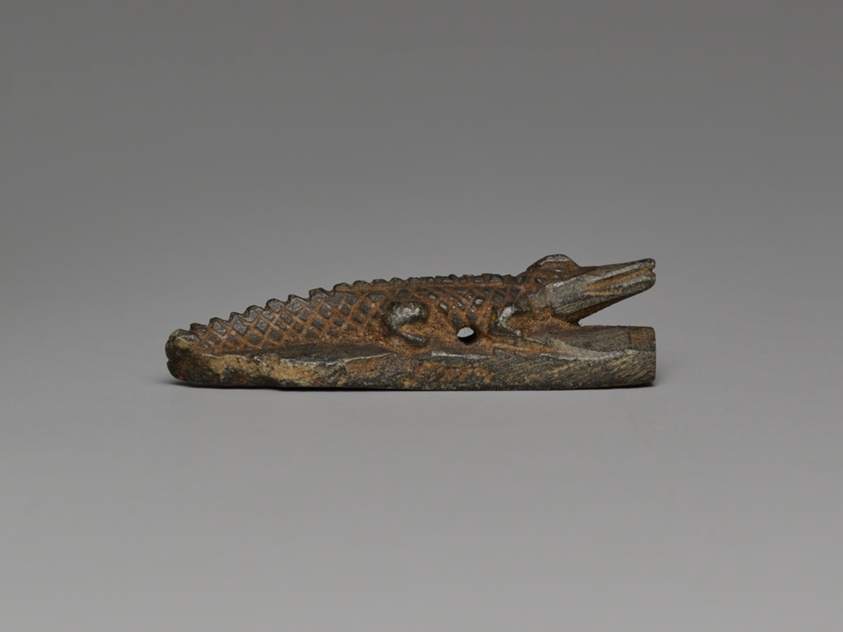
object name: Costume and Accessories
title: Amulet of a Crocodile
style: egyptian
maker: Egyptian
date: New Kingdom–Third Intermediate Period (about 1500–664 BCE)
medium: Steatite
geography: Egypt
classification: amulet; jewelry; stone; ancient art; costume